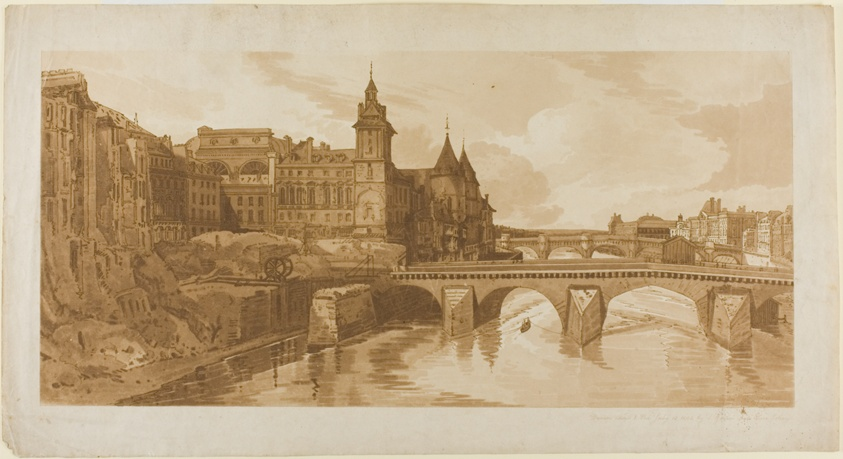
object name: Print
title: View of Pont au Change, the City Theatre, Pont Neuf, Conciergerie Prison, etc. taken from Pont Notre Dame, from A Selection of Twenty of the Most Picturesque Views in Paris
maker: Thomas Girtin (English, 1775-1802)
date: July 12, 1802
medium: Soft ground etching, with aquatint in brown ink on cream wove paper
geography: United Kingdom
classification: etching; paper; print; prints and drawing